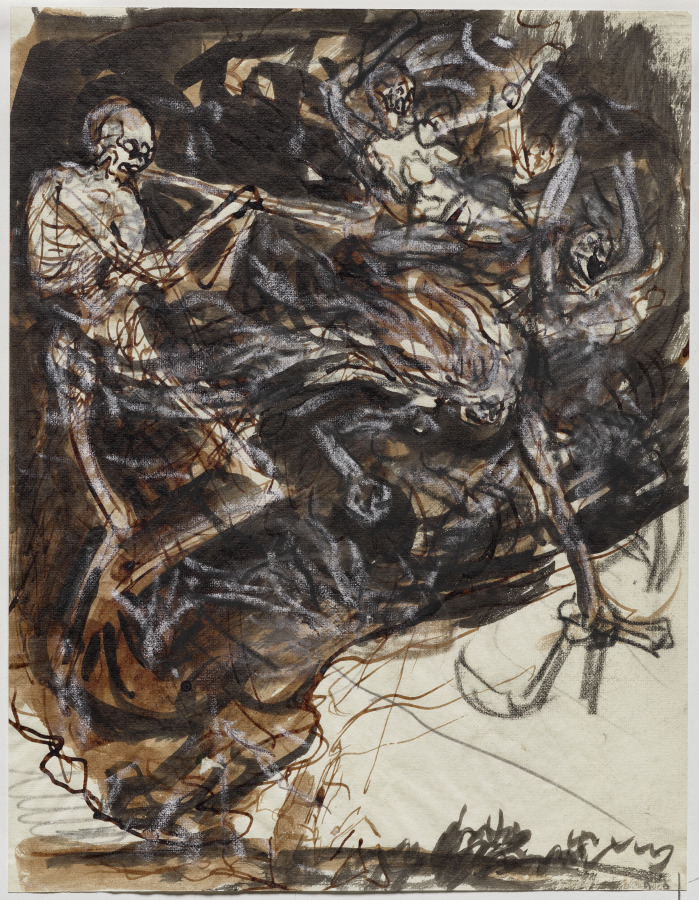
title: La Mort et les Passions fondant sur la terre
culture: France, 20th century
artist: Auguste Louis Lepère (French, 1849–1918)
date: 1914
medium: black crayon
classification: Drawing